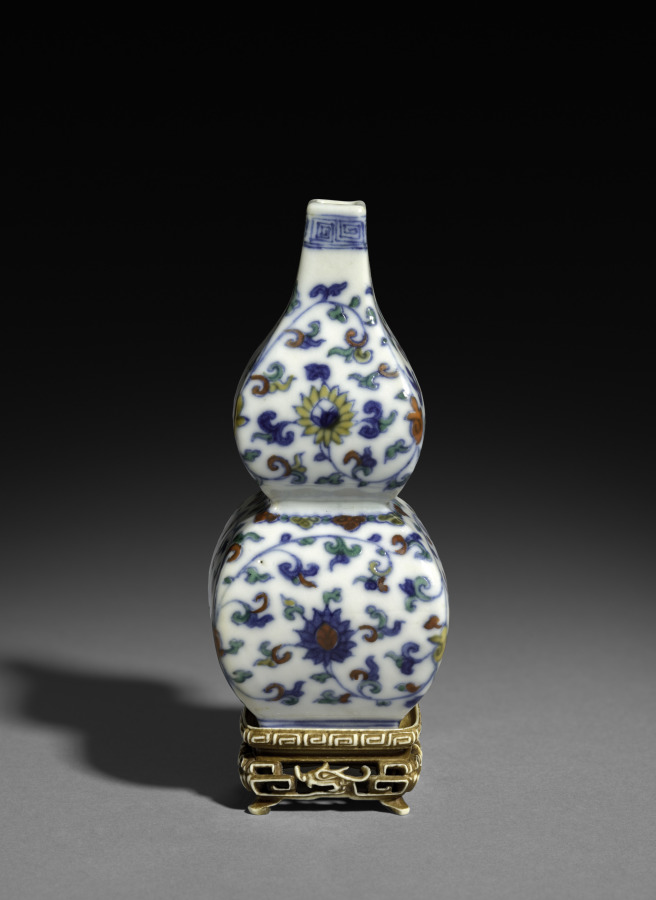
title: Square Double-Gourd Vase with Floral Scrolls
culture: China, Jiangxi Province, Jingdezhen kilns, Ming dynasty (1368–1644), Jiajing mark and reign (1522–66)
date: 1522–66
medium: porcelain with underglaze blue decoration and overglaze enamel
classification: Ceramic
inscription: 大明嘉靖年製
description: In the Ming dynasty (1368–1644), luxury items became more affordable to larger parts of the society, including women, merchants, and literati in non-official positions. Imperial patronage and a growing urban population encouraged consumption of luxury goods and local craftmanship.